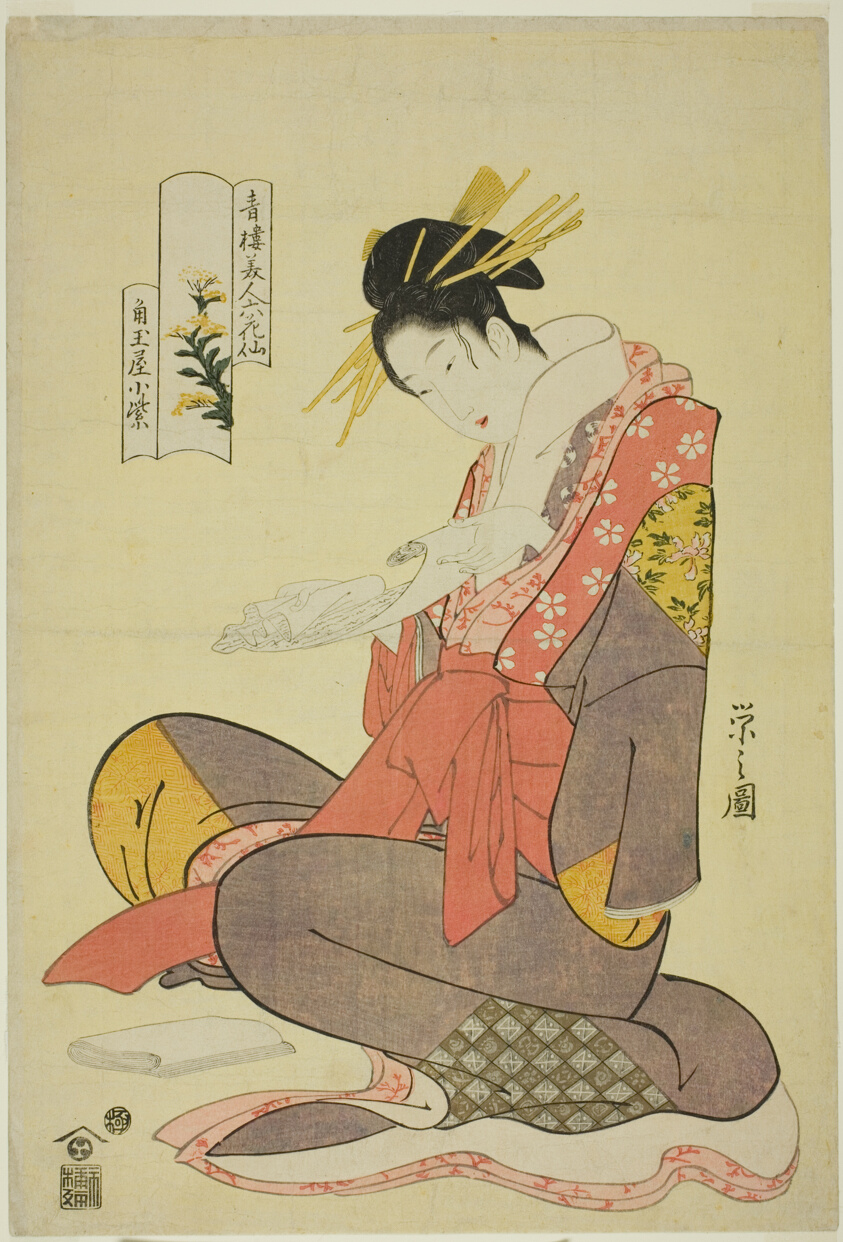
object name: Print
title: Komurasaki of the Kadotamaya, from the series Six Flowery Immortals of the Pleasure Quarters (Seiro bijin rokkasen)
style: Japanese (culture or style)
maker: Chobunsai Eishi; Japanese, 1756-1829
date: c. 1794/95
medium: Color woodblock print; oban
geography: Japan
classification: woodblock print; print; asian art